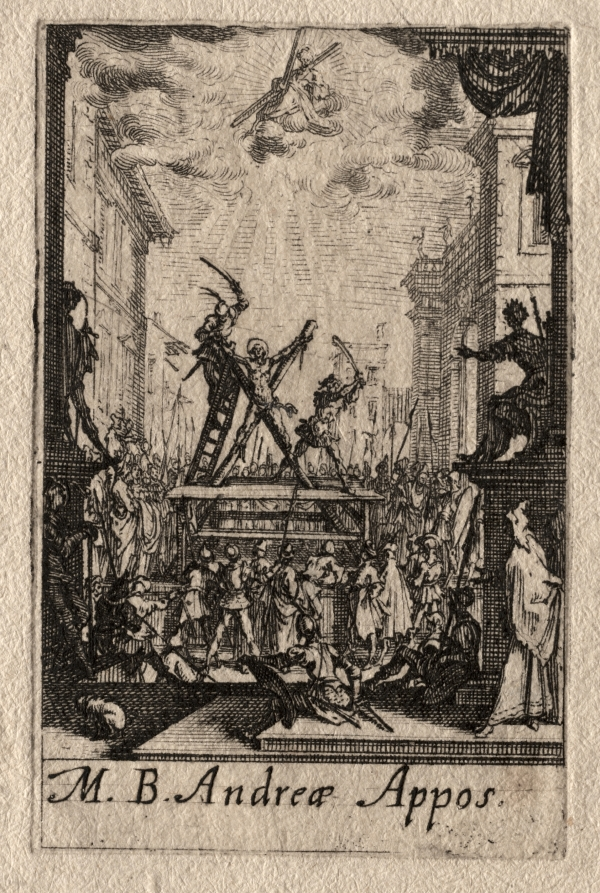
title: The Martyrdom of the Apostles: St. Andrew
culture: France, 17th century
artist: Jacques Callot (French, 1592–1635)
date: ca. 1632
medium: etching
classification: Print